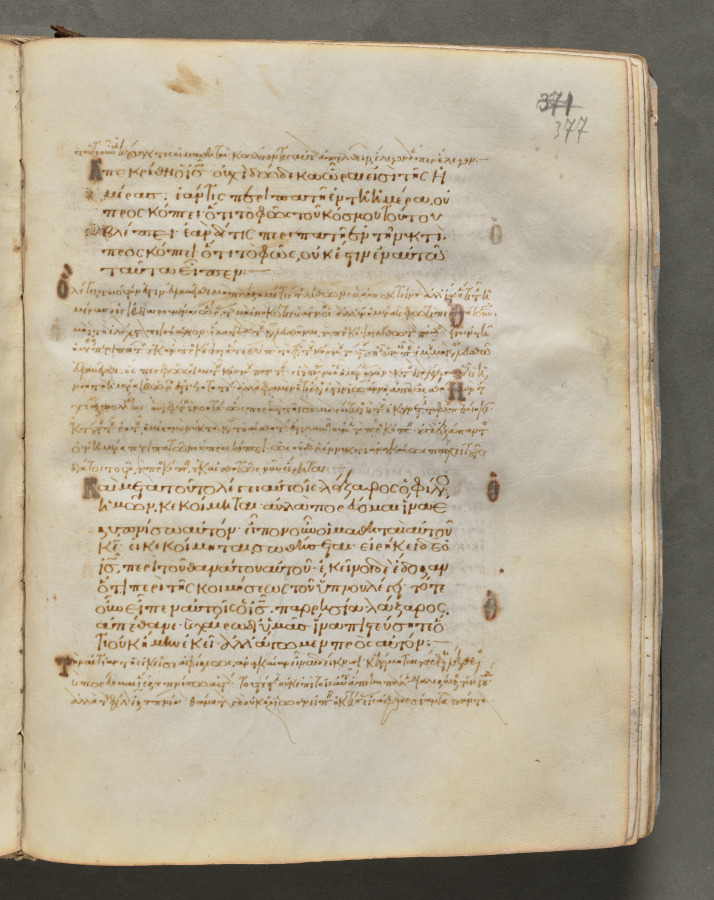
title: Text, folio 377 (recto), from a Gospel Book with Commentaries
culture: Byzantium, Constantinople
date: c. 1000–1100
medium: ink, tempera, and gold on vellum; leather binding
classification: Bound Volume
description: Each of the four gospels in this book opens on a page with brilliantly illuminated borders depicting the author of the text as well as birds—principally peacocks, symbols of the immortality of the soul—and fountains, representing the fountain of life and the salvation of the soul. This volume consists of 428 leaves with texts in Greek. Its level of sophistication suggests that it was probably written and decorated in a monastery in Constantinople.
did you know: Gospel books were carried in procession through Byzantine churches.